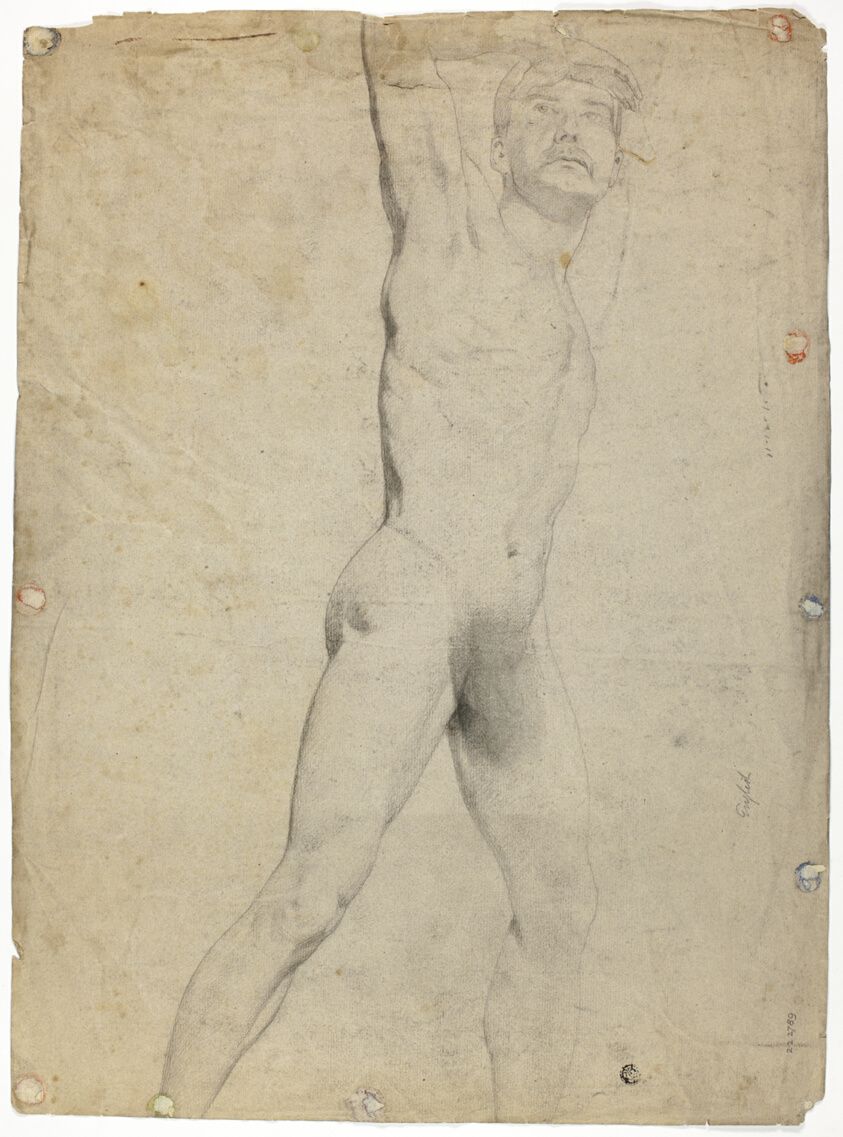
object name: Drawing and Watercolor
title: Diogenes Asking Alexander the Great to Step Aside (recto); Striding Academic Male Nude (verso)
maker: Unknown Artist; French, 19th century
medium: Charcoal and black chalk with stumping, heightened with white chalk (recto), and charcoal with stumping (verso) on cream laid paper with blue fibers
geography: France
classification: charcoal; drawings (visual works); prints and drawing; chalk; paper